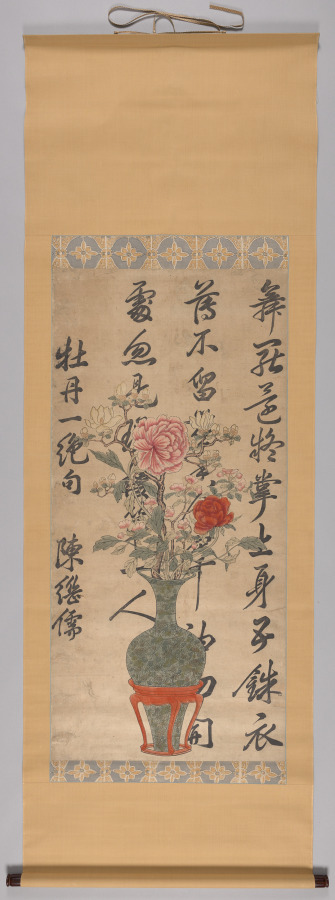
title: A Quatrain about Peonies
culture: China, Qing dynasty (1644–1911), Qianlong reign (1736–95)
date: 1736–95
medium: Hanging scroll; polychrome woodblock print; ink and color on paper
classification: Print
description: Woodblock printing in color reached its height in China in the 1600s to 1700s. It was executed by means of sets of separate blocks, each carved to print a different color.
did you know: In the 1600s, printing flourished in such Jiangnan cities as Nanjing, Suzhou, Hangzhou, and Huizhou, evolving from privately enjoyed illustrated books printed in color to more commercialized single-sheet color prints that were hung on walls and became part of the rich urban visual culture.